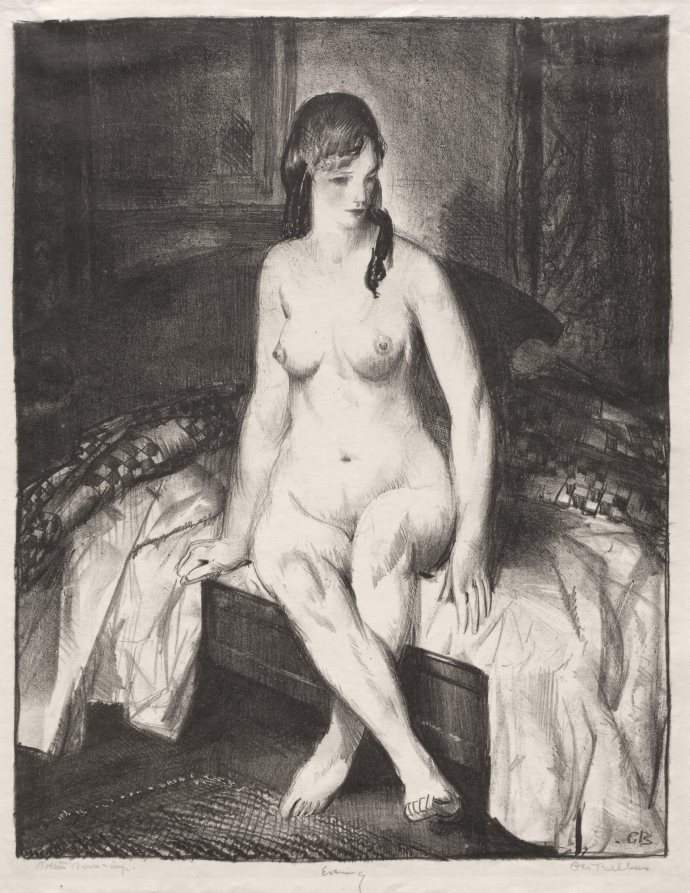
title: Evening, Nude on a Bed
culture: America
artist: George Bellows (American, 1882–1925)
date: 1921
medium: lithograph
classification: Print